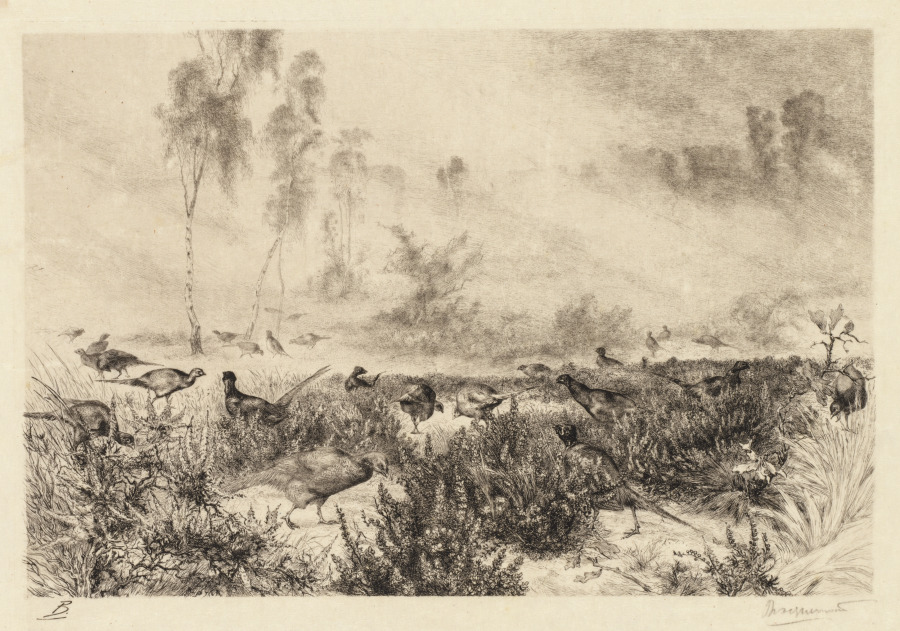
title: Morning Mists (Brumes de Matin)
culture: France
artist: Félix Bracquemond (French, 1833–1914)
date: c. 1880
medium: Etching with drypoint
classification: Print